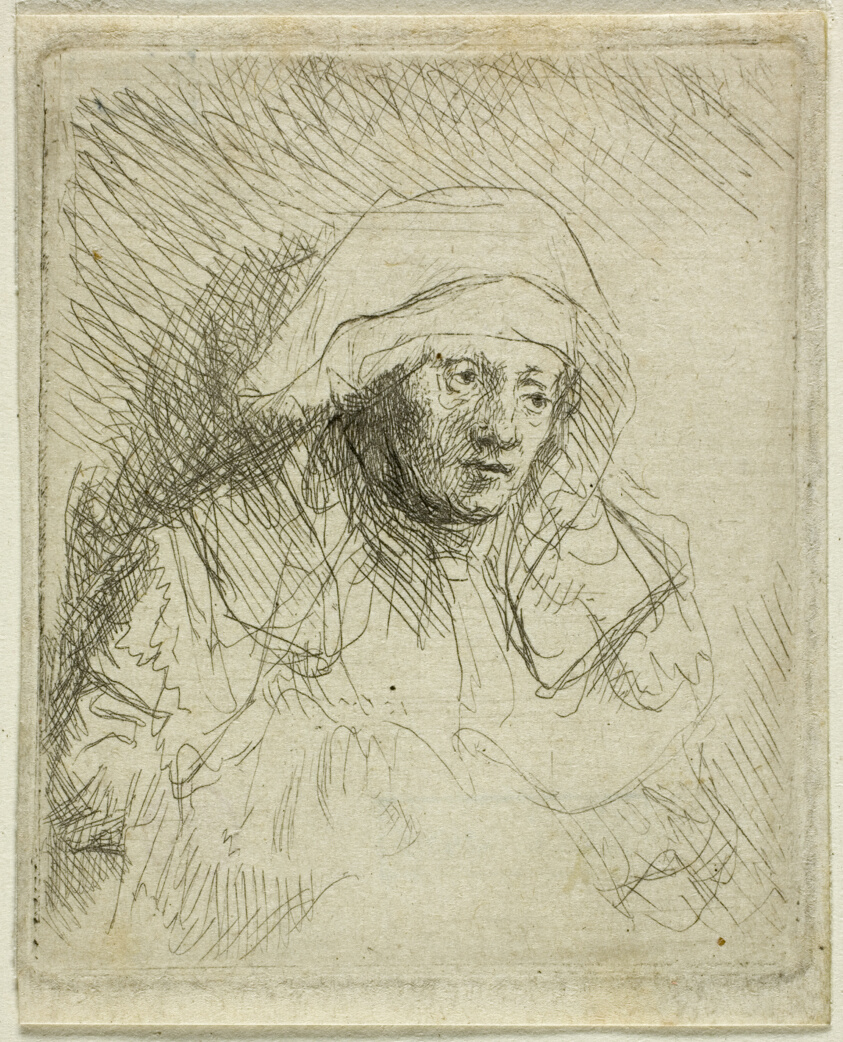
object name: Print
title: Sick Woman with a Large White Headdress (Saskia)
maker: Rembrandt van Rijn (Dutch, 1606-1669)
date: c. 1645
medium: Etching on paper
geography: Holland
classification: etching; print; prints and drawing; paper